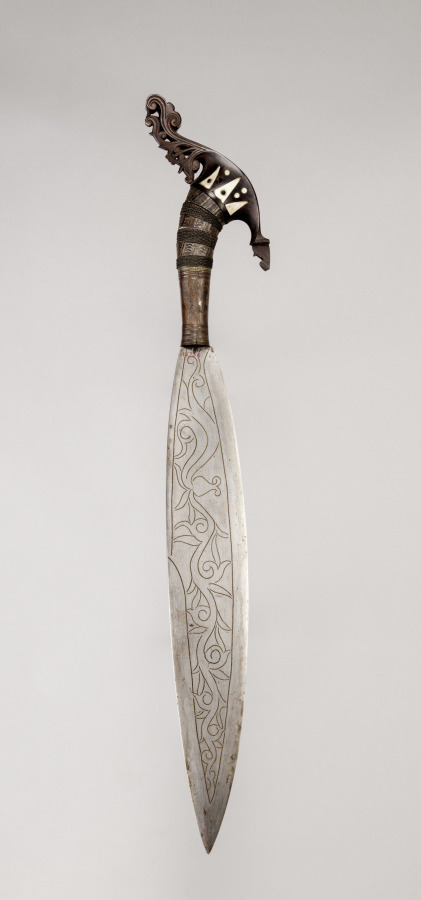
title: Sword (Barong)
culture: Philippines, Sulu or Basilan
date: before 1916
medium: Blade: metal inlaid with brass; handle: metal with silver foil, braided wire, and repoussé work; pommel: kamagong hardwood with bone inlay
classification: Arms and Armor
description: This sword’s hilt is carved from a dense Philippine hardwood known as kamagong and takes the form of a stylized cockatoo (kakatua), a motif characteristic of Tausug and Yakan sword hilts. Its broad, leaf-shaped steel blade is single-edged at the base and double-edged near the tip, making it ideal for thrusting in both warfare and ceremony.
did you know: The cockatoo-shaped pommel symbolizes vigilance and status among the Moro people of the southern Philippines.